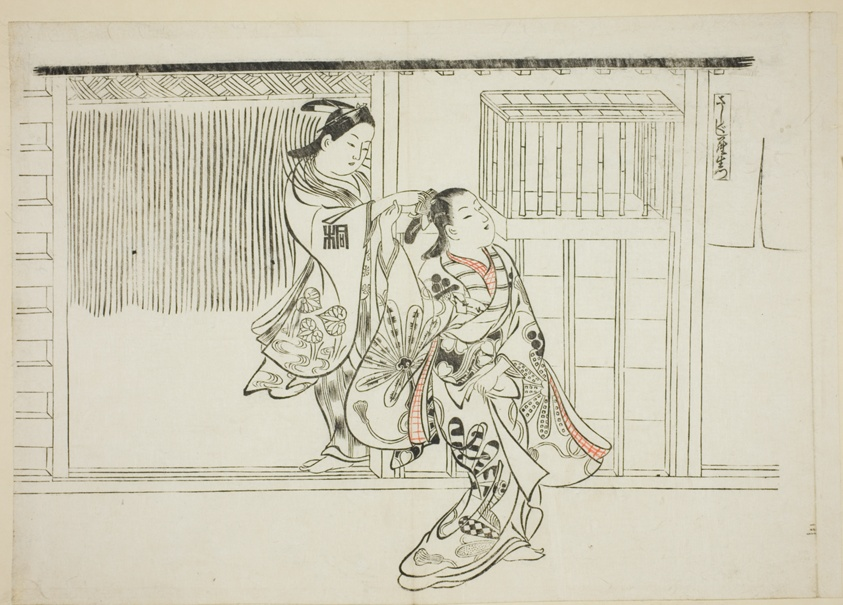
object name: Print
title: Comb Rashomon (Sashigushi Rashomon), no. 3 from a series of 12 prints depicting parodies of plays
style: Japanese (culture or style)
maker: Okumura Masanobu (Japanese, 1686-1764)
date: c. 1716–35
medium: Hand-colored woodblock print; oban, sumizuri-e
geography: Japan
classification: woodblock print; print; asian art